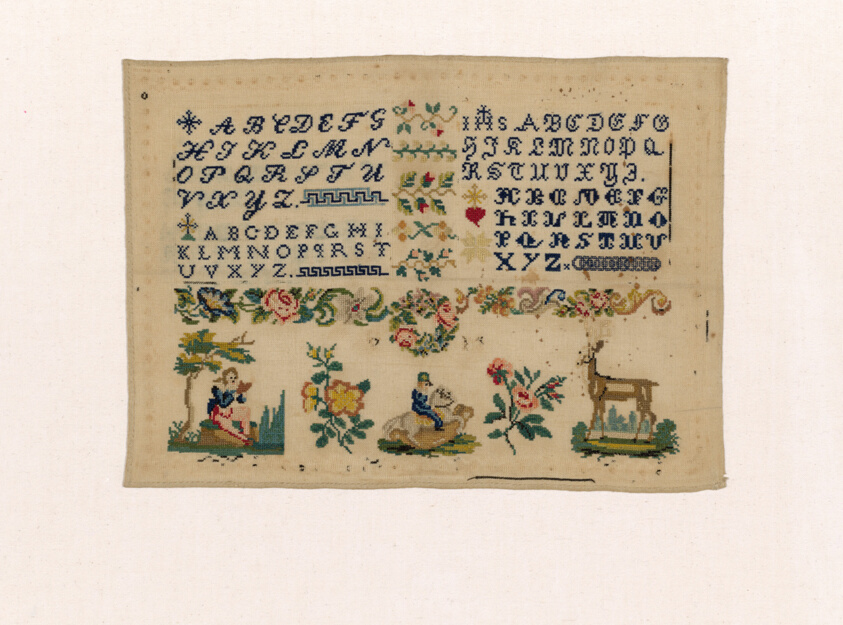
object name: Textile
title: Sampler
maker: Italy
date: 1801/75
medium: Cotton, plain weave; embroidered with silk in back, cross, and padded cross stitches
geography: Italy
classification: textile; needlework (visual works)